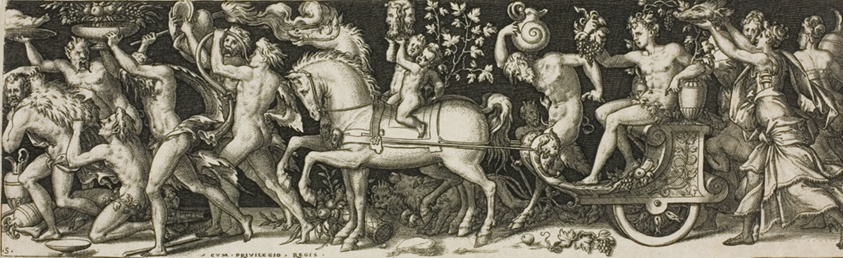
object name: Print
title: Combats and Triumphs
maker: Etienne Delaune; French, c. 1519-1583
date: 1550/1572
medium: Engraving on paper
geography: France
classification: engraving; print; prints and drawing